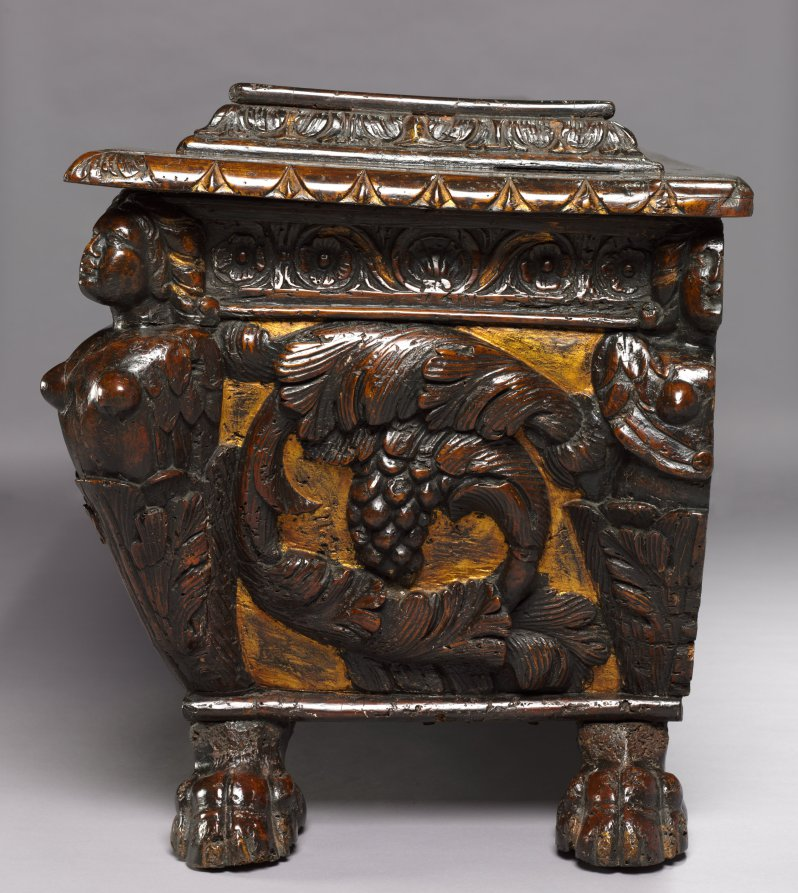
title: Marriage Chest (Cassone)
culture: Italy, early 16th century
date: early 1500s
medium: walnut with traces of gilding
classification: Furniture and woodwork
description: Large storage chests resembling ancient Roman burial vaults-a popular collectible among wealthy families during the Renaissance-were often associated with an important marriage and contained the wife’s dowry of clothes and precious objects. This particular example displays the arms of the Spada Family of Rome amidst a richly carved façade on a gilded ground. Sometimes cassoni were carried in the marital procession from the bride’s home to that of her future husband, emphasizing the power and wealth of both families.